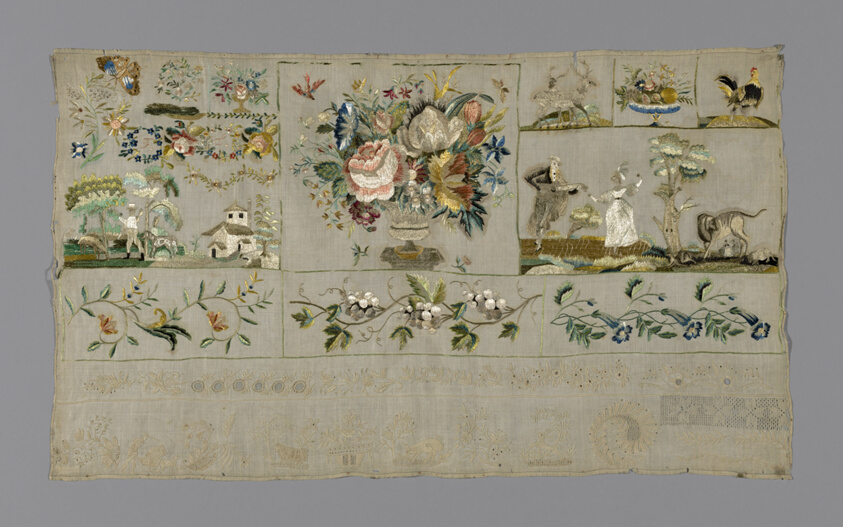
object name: Textile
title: Sampler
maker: Possibly France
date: 19th century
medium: Linen, plain weave; cutwork embroidered with cotton in overcast stitch; pulled threadwork embroidered with cotton in hem, interlocking and outline stitches; embroidered with silk in outline, satin and stem stitches; French knots; bobbin lace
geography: France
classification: textile; needlework (visual works); sampler